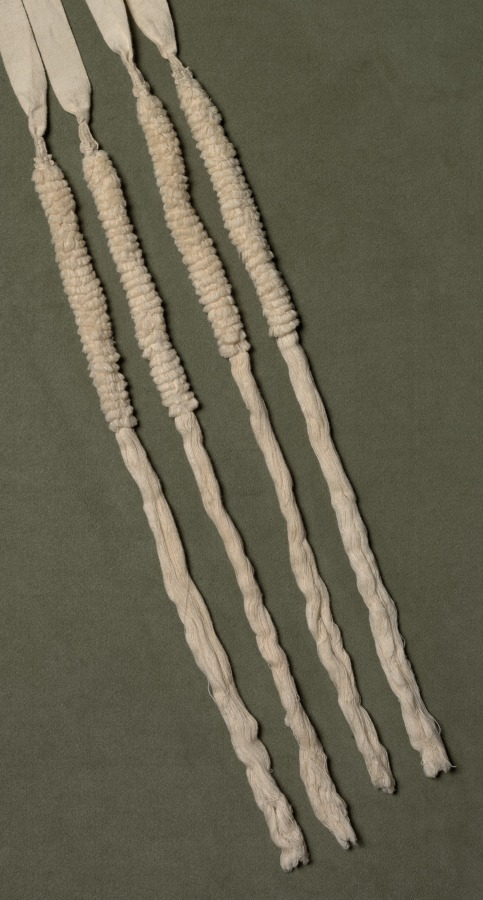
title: Band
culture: Peru, Chimú or Chimú-Inka, 12th-16th century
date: 1100–1532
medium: white cotton; plain weave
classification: Textile